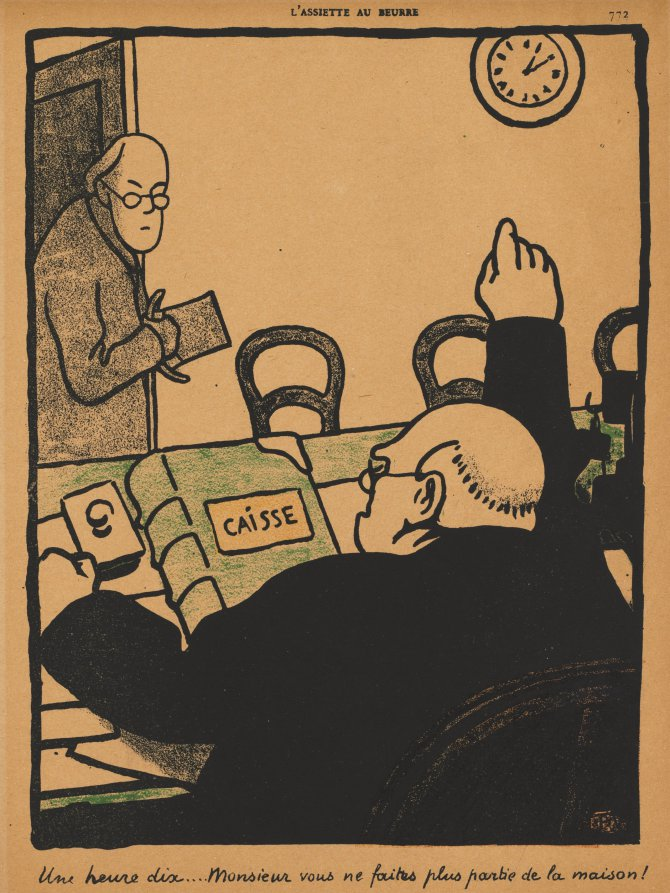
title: Ten past one...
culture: France, 19th century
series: Crimes and Punishments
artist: Félix Vallotton (Swiss French, 1865–1925)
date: 1901, published 1902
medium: color lithograph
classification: Print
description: This print was published in the magazine L’Assiette au Beurre (March 1, 1902 ) as plate 15 from the series Crimes and Punishments.